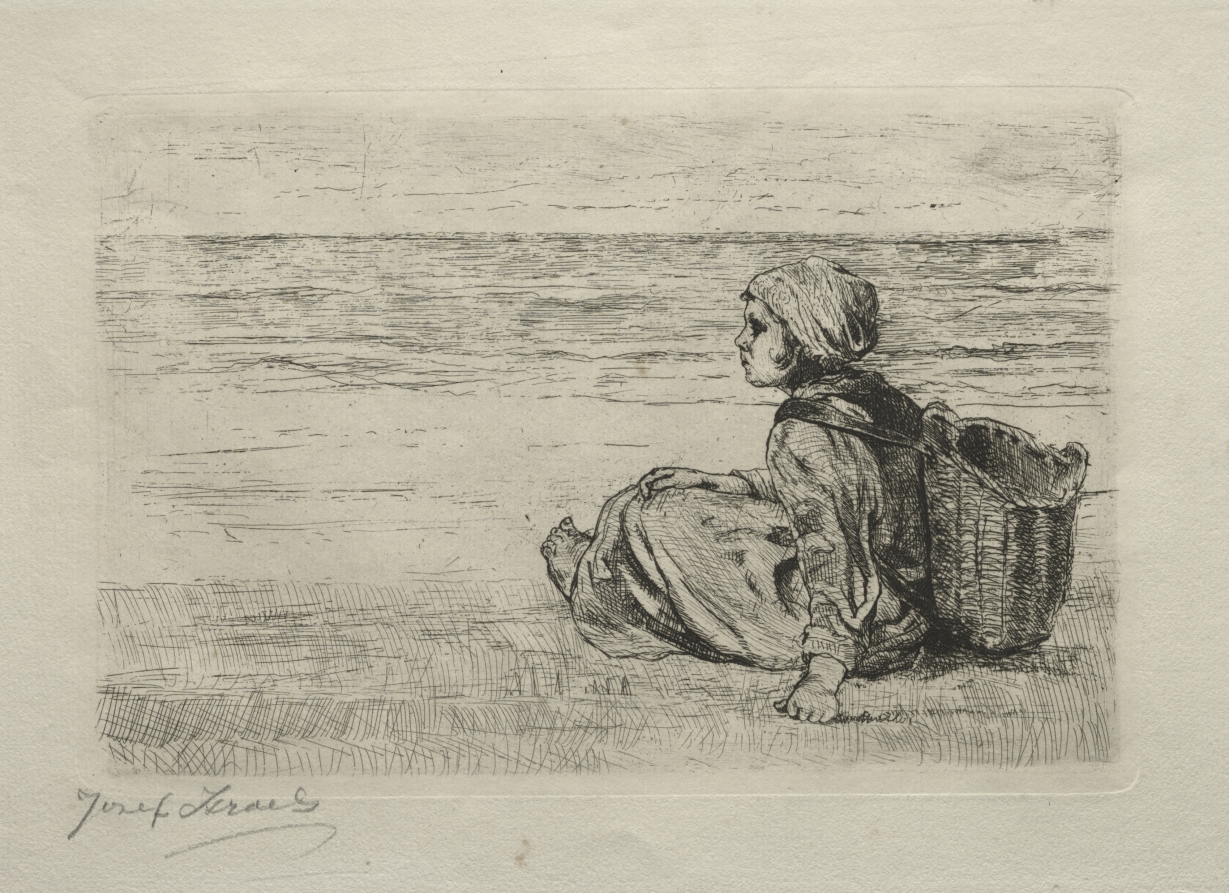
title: Girl with basket seated on the shore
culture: Netherlands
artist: Jozef Israëls (Dutch, 1824–1911)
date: 1879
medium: etching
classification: Print